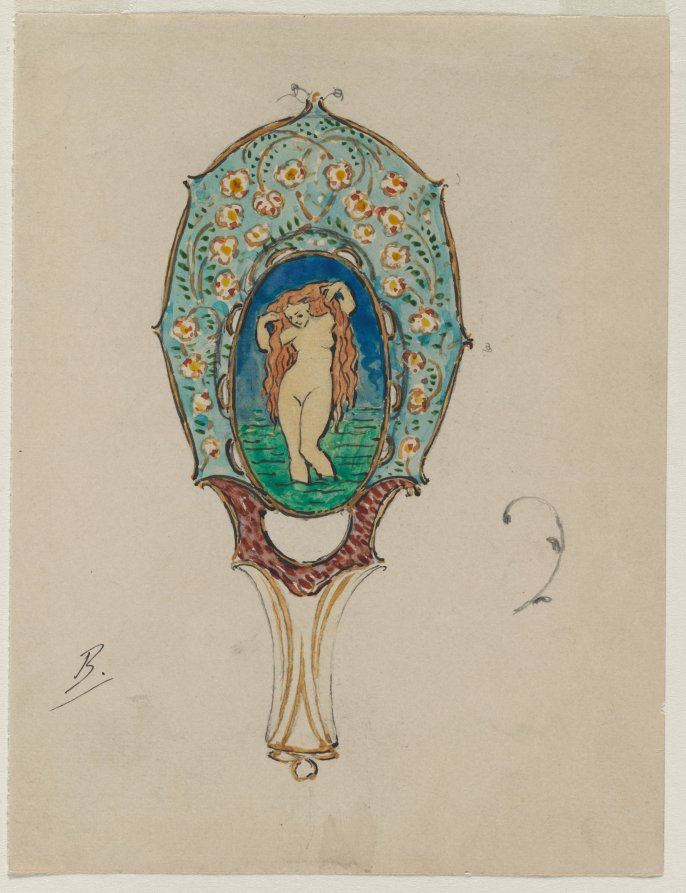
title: Design for a Hand Mirror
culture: France, 20th century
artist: Félix Bracquemond (French, 1833–1914)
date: c. 1900–1902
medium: watercolor and black ink with graphite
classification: Drawing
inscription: The window mat bears an inscription written in graphite pencil along the bottom edge: "ENCRE DE CHINE/ET/AQUARELLE/BRACQUEMOND (FELIX) - 1833 - 1914 PROJECTS DE MIROIR UTILISANT UN BAS RELIEF DE RODIN Rep_?_ Arts Decoration 1902 Tome XII p. 10 Pour le Baron Vita."